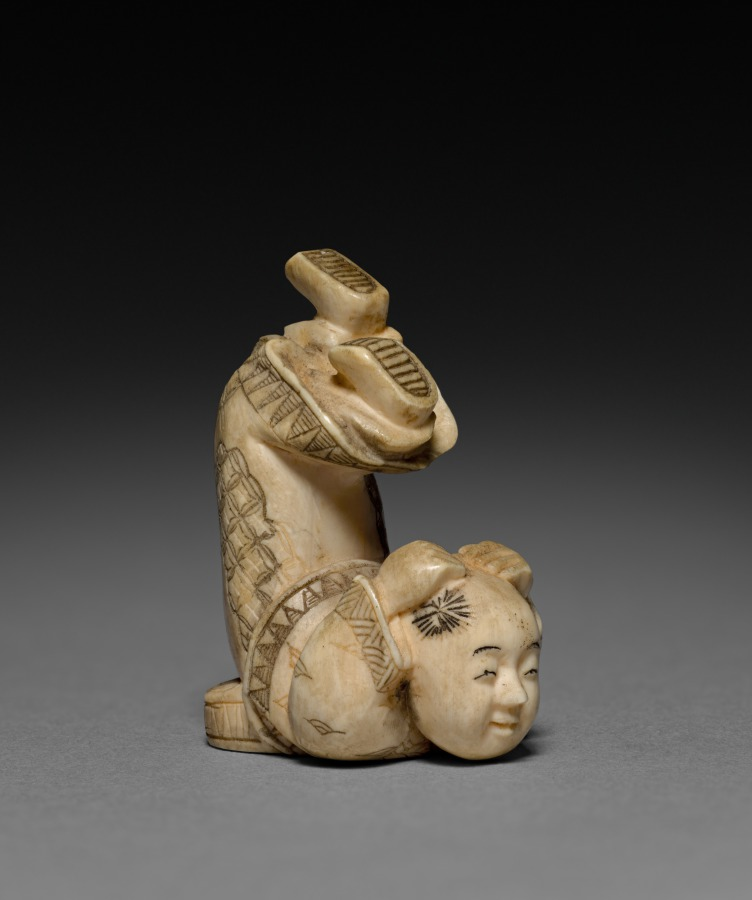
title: Netsuke of Child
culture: Japan, Meiji period (1868–1912)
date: early 1900s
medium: ivory, pigment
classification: Ivory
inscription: 玉心